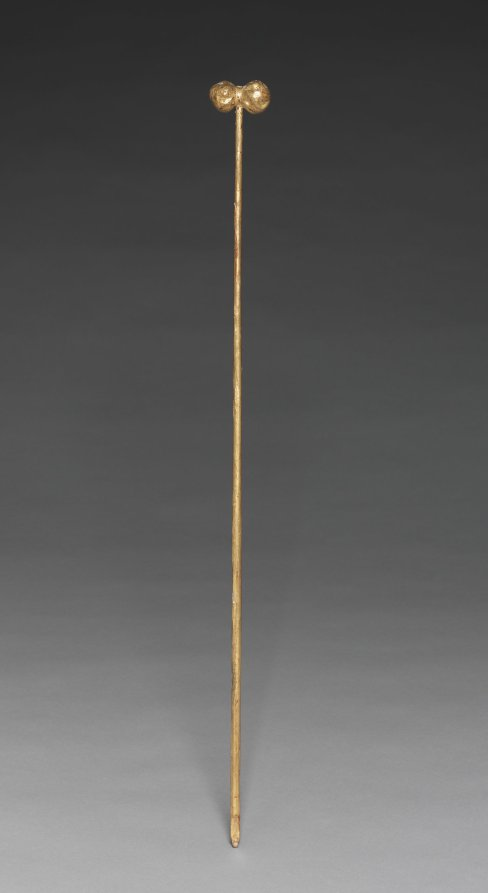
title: Altarpiece with Relics - Sponge, lower left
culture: Germany, Bavaria, 18th century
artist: Joseph Matthias Götz (German, 1696–1760)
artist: and Workshop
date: c. 1735–1740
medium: gilded wood, with relics in niches: gilded wood, mother-of-pearl, ebony, red silk, gold wire, seed pearls, rock crystal, pen and ink on paper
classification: Sculpture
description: Götz covers every surface in gold leaf, giving each part of the object equal importance, rather than simply framing a central picture. In this distinctively Central European approach, figural narrative is subordinate to the overall ensemble. Götz designed this object to rest on top of an altar, probably in front of a larger painted or sculpted decorative scheme. The work contains relics seen through the small windows on the perimeter. These small remains of holy figures demonstrate the persistence of a medieval Catholic tradition well into the 1700s.